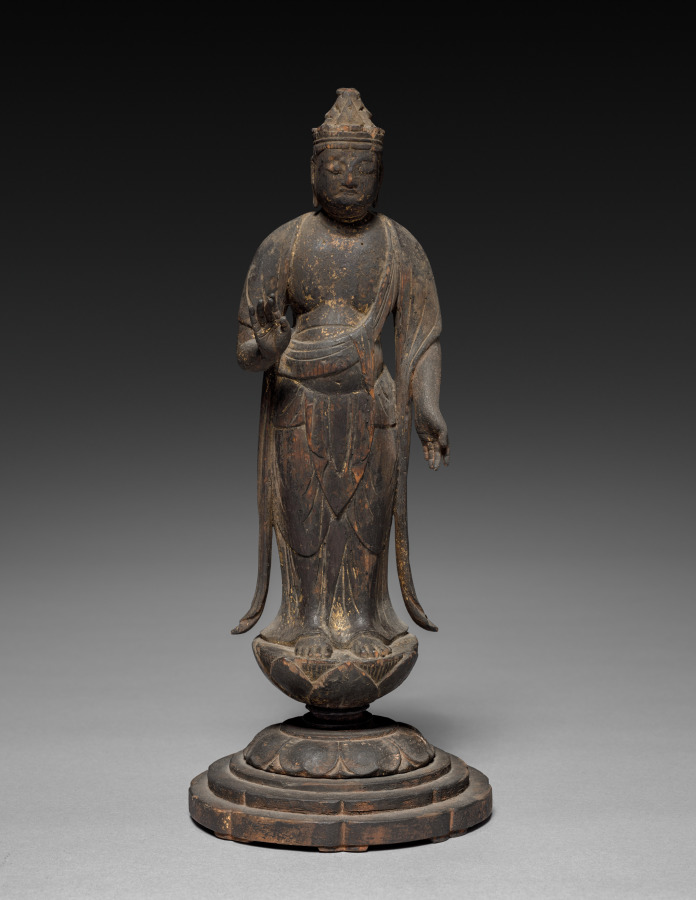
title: Kannon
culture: Japan, Heian period (794–1185) or Edo period (1615–1868)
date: 1000s or c. 1800–1868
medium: Wood with traces of lacquer and gilding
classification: Sculpture